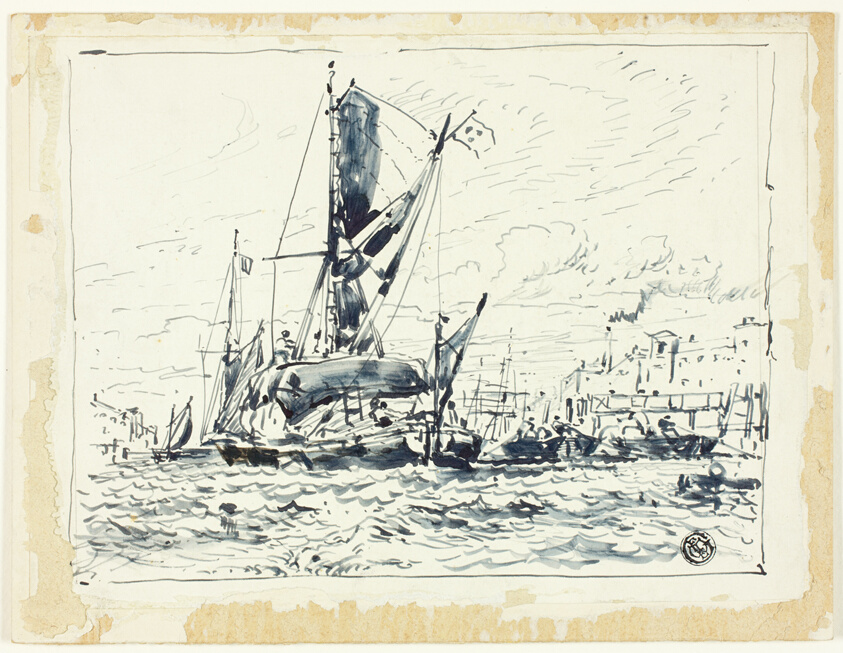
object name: Drawing and Watercolor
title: Boat in Port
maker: Attributed to William Roxby Beverley; English, c. 1811-1889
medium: Pen and brush and gray ink, on ivory wove paper, laid down on board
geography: England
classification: pen and ink drawings; drawings (visual works); prints and drawing